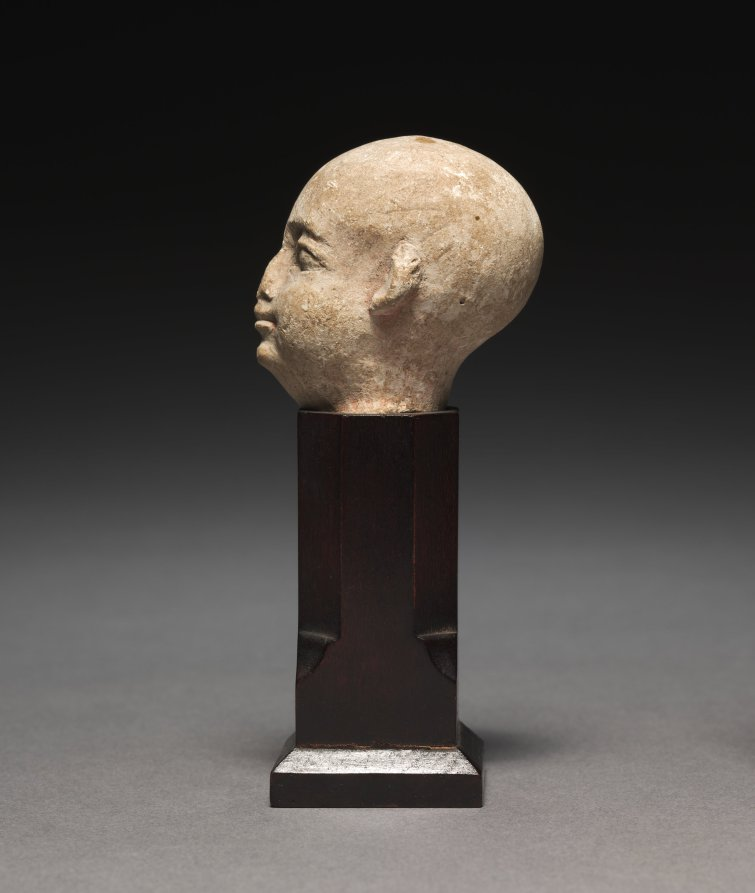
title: Small Head of a Man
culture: Egypt, Greco-Roman period (332 BCE–395 CE), Ptolemaic dynasty (305–30 BCE)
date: 305–30 BCE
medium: limestone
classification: Sculpture